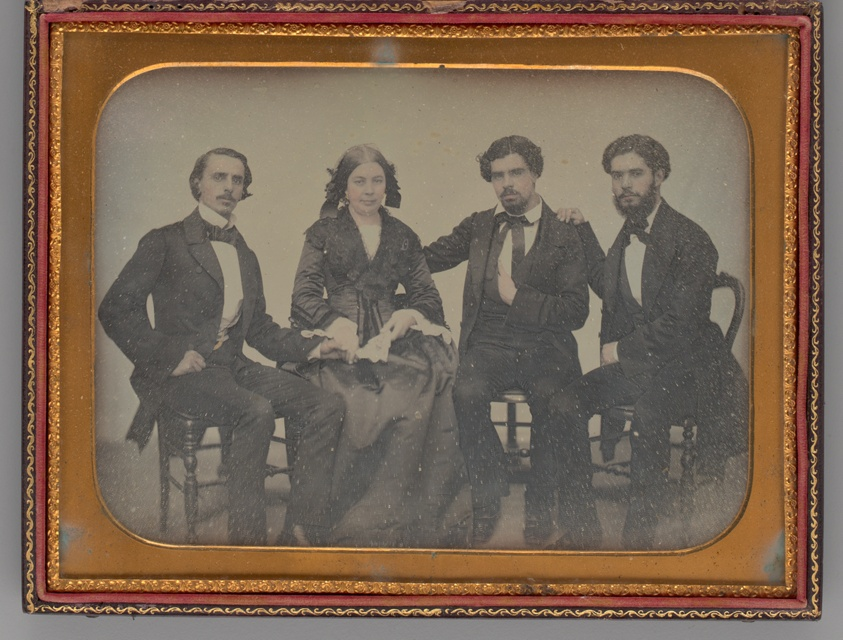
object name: Photograph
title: Untitled (Portrait of Three Men and One Woman)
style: 19th century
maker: Unknown maker; American, 19th century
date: 1857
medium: Daguerreotype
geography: United States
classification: portrait; photograph; photographic process; photography; portrait; daguerreotype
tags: lundberg collection, portraits: multiple subjects, portraits: male subject, portraits: female subject, portrait, Male, female, family, families, portraits